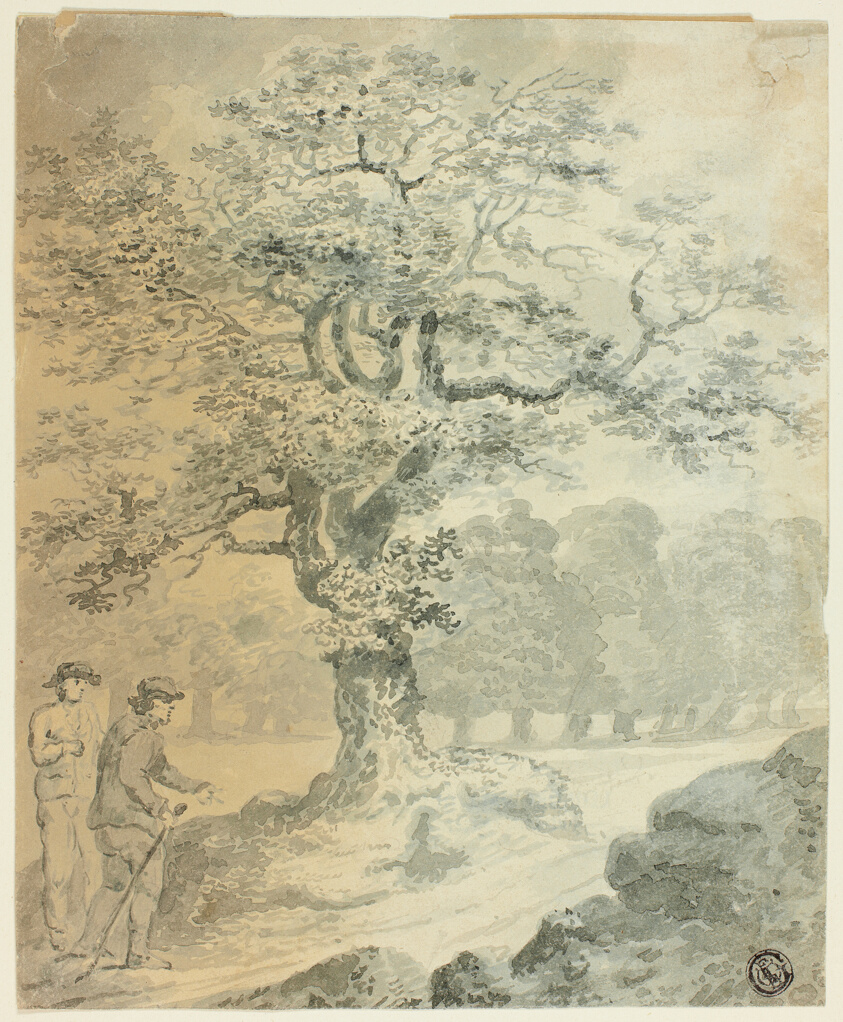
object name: Drawing and Watercolor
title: Landscape with Two Male Figures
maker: After Gilbert Stuart Newton (English, 1794-1835); or Paul Sandby Munn (English, 1773-1845); or Edward Dayes (English, 1763-1804)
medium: Brush with gray and green wash, on ivory wove paper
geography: England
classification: ink or chalk wash; drawings (visual works); prints and drawing